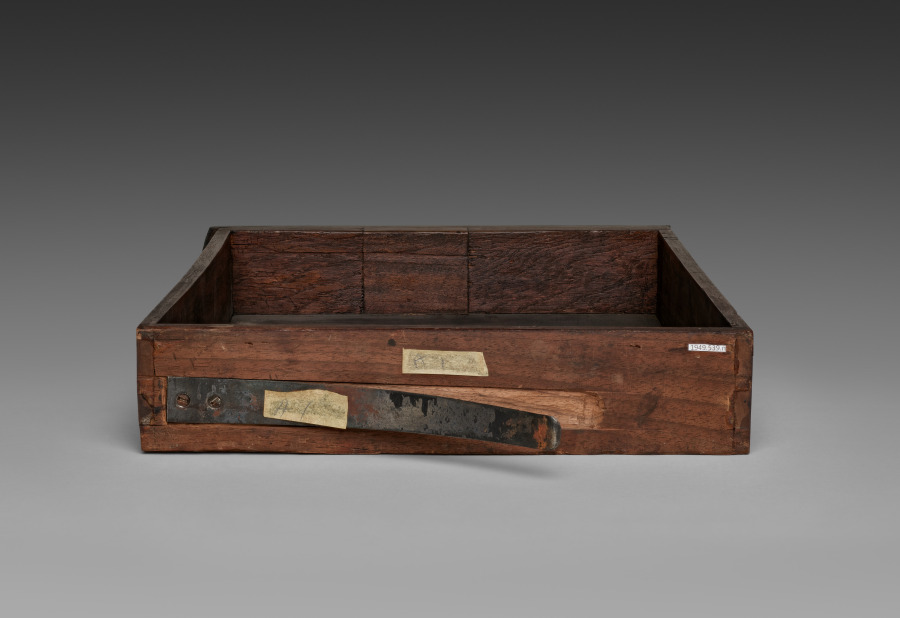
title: Drawer for Cabinet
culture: France, late 17th Century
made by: André-Charles Boulle (French, 1642–1732)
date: c. 1690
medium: ebony, marquetry in metal and tortoiseshell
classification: Furniture and woodwork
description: Appointed cabinetmaker to King Louis XIV in 1672, André-Charles Boulle became a master of furniture making in France during the late 1600s until his death in 1732. Known primarily for his use of marquetry, in which metal patterns are inlaid into tortoiseshell then applied within the veneered surface of the furniture, Boulle established a level of quality and craftsmanship few others could achieve. As a result, his work found favor at the royal court and among other aristocrats and diplomats eager to impress the king. The inclusion of a medallion depicting Louis XIV within the bronze decoration of this chest would have identified the owner with the royal court. Often exhibiting stout architectural proportions with elegant groups of inlaid motifs such as the parrot on the central panel of this chest, Boulle’s designs are an example of the intellectual fashion for contrasting ideas, materials, and motifs.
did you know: Originally designed to sit atop an elaborate tall stand, this chest was likely altered in the late 1700s to reduce its scale and height.